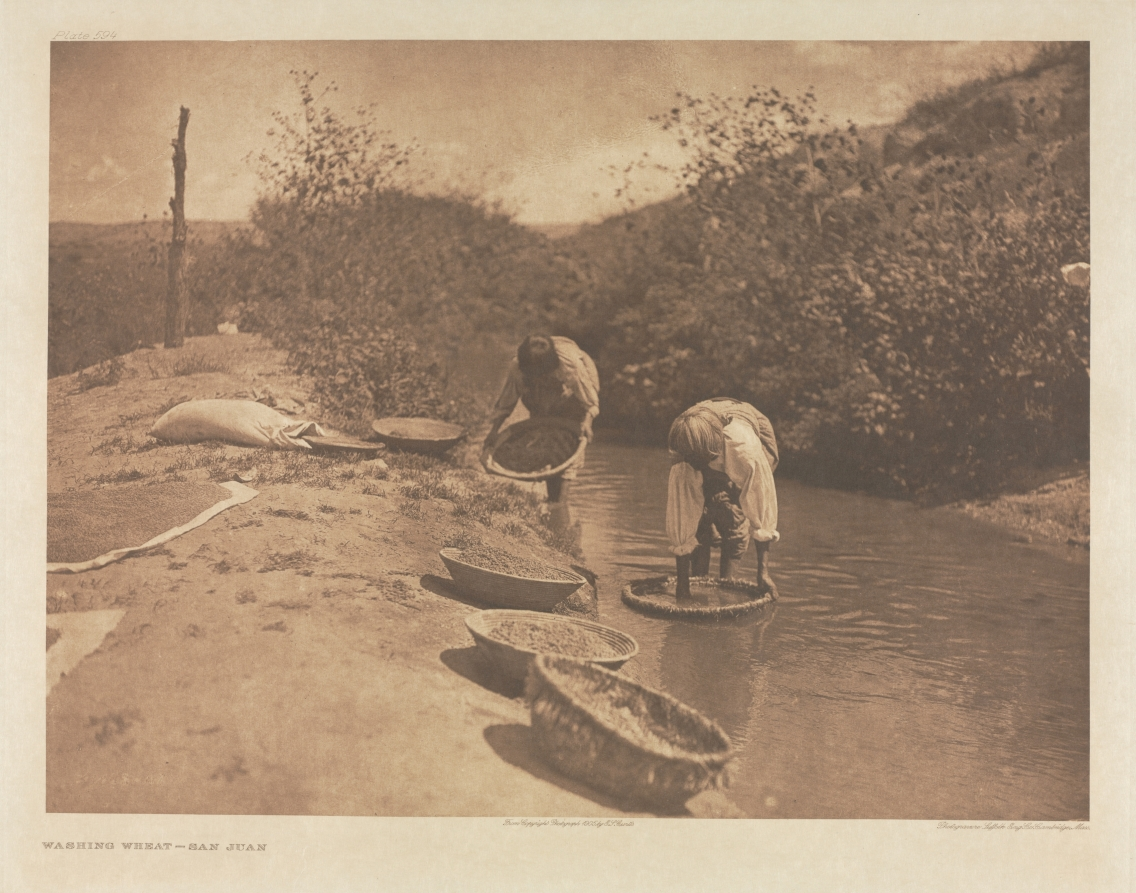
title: Portfolio XVII, Plate 594: Washing Wheat - San Juan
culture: America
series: The North American Indian: being a series of Portfolios picturing and describing the Indians of the United States, the Dominion of Canada, and Alaska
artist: Edward S. Curtis (American, 1868–1952)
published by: The University Press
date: 1905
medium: photogravure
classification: Portfolio